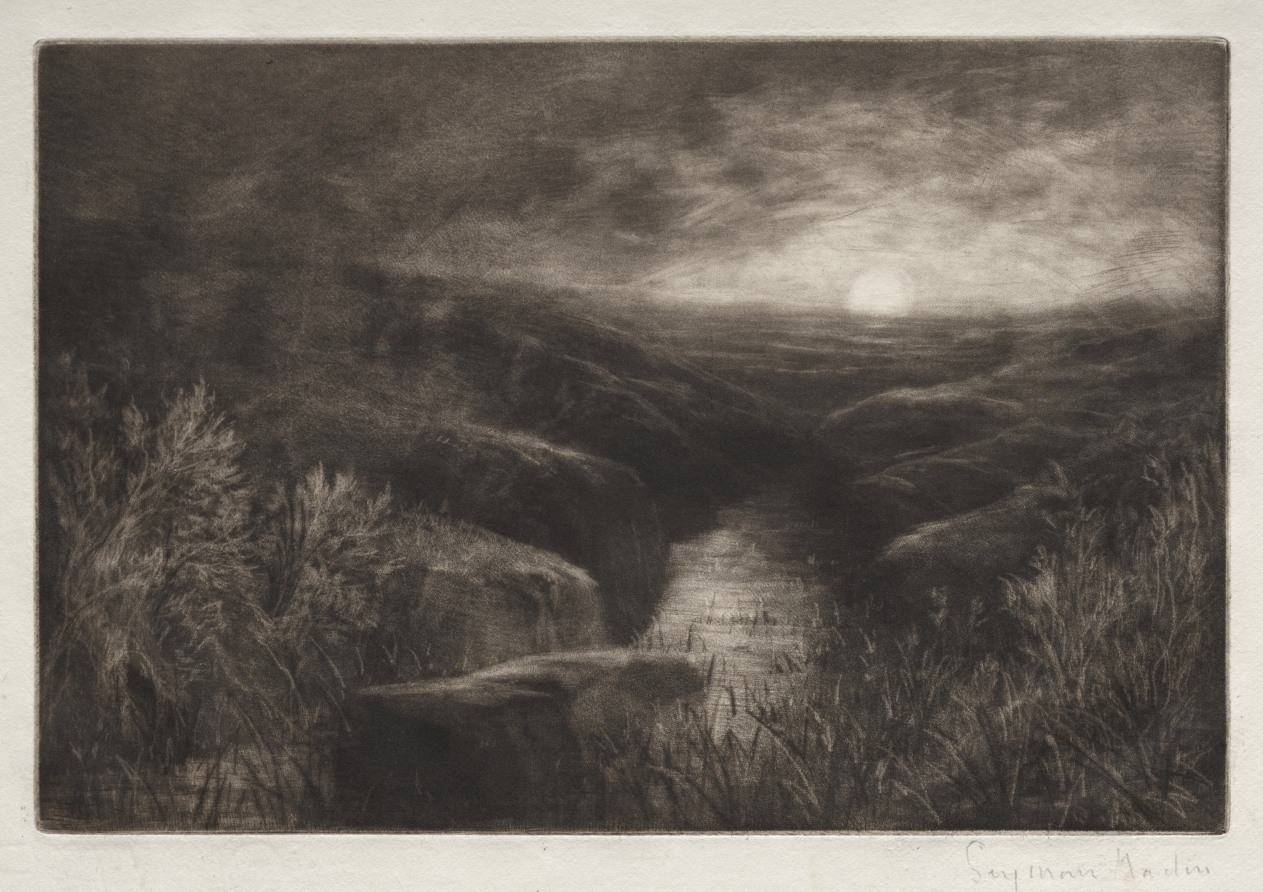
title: Haunt of the Mosquito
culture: England, 19th century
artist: Francis Seymour Haden (British, 1818–1910)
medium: mezzotint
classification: Print